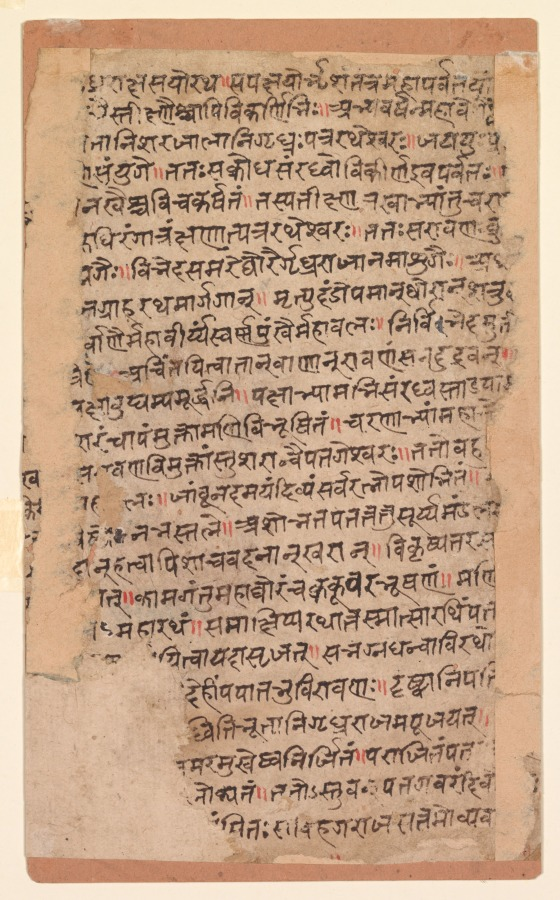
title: Battle of Ravana and Jatayu, from Chapters 50 and 51 of the Aranya Kanda (Book of the Forest) of Valmiki's Ramayana (Rama’s Journey); folio from the "Burnt" Ramayana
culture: Central India, Bundelkhand Region, Madhya Pradesh, Rajput Kingdom of Datia, Court of Raja Bir Singh Deo (reigned 1605–27)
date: c. 1605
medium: Gum tempera and ink on paper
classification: Painting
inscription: [[verso, text of Battle of Ravana and Jatayu: Sanskrit text in devanagari script]]: Now [an extraordinary fight ensued] there between the vulture [Jatayu] and the demon [Ravana], quite violent [as if] between two great, winged mountains. With sharp [arrows, broad-headed and made of iron] and spears too, [that immensely powerful demon] forcefully showered [the King of Vultures]. In the course of battle that vulture, Jatayu, Lord of Birds, [confronted] that mass of arrows [the weapons of Ravana], and then he, [that vulture], like a mountain shaken about [fell backward], and with his talons dragged him [Ravana] down, overcome by anger. And that immensely powerful Lord of Birds instantly made his [Ravana’s] limbs bloodied with his sharply taloned feet. Then, Ravana [in a rage] pierced the King of Vultures in battle with [three direct arrows], frightful and swift. And after, he took up his other dreaded arrows on reserve, [with their arrowheads straight]. Each one resembled Death’s staff, [crushing insolence in] enemies. That immensely powerful, mighty demon pierced the [the bird’s body] with [perfectly sharp], golden-feathered arrows . . . . Without even taking those arrows into account, that enraged bird launched himself at Ravana. [Flying upward and then rushing down], raising his wings overhead, he battered [Ravana] with those feathered limbs. [Then, that Lord of Birds, energy blazing, splintered] with his claws [Ravana’s] bow and arrows, adorned with gems and pearls. And that Lord of Birds [splintered] also those very arrows shot [by Ravana]. Then, that immensely powerful [Indra of Birds] [over and over again, pecked at Ravana’s divine crown] made of gold and glittering with every jewel, and [being full of rage, hurled] it through the sky. Like the sun’s halo, it glistened as it sank. [That bird] struck down the asses, with their golden chest armor and devilish [pishacha] faces, and yanking them about, [instantly deprived them of breath]. He [smashed] the fearsomely huge chariot, which flies upon a wish, ornamented from wheel to pole, [each part arrayed in gold] and jewels. Tearing the charioteer from the chariot, [that Lord of Birds], with talons [that seemed like elephant goads, quickly shred him], then tossed him away. Ravana, his bow broken, chariot done with, [his asses killed, his charioteer slain,] fell to the ground, holding Vaidehi [in the crook of his arm]. Seeing Ravana fallen to the ground, his chariot smashed, all the other creatures celebrated the King of Vultures, crying—“Well done, well done!” [And the gods and sages] were amazed when they saw [Ravana, the destroyer of pride among enemy armies,] who was never defeated [by the gods and demons] on the front lines, defeated now [by the best of birds]. Then the denizens of the heavens praised that best of birds—“O excellent one, you have accomplished a difficult task!” The venerable King of Birds, who was extolled, became resolute and once again endured battle.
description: The vulture Jatayu, Lord of the Birds, his beak agape, loses feathers and dark red blood in his desperate fight to save Sita from her kidnapper, the ten-headed Ravana. Since this painting was damaged by fire in India decades ago, Sita is barely visible now at the bottom right corner, in Ravana’s donkey-led chariot. Her expression is pensive, as she awaits her fate. In adherence to the Ramayana text written on the back of the painting, the donkeys were the first victims in the battle that will claim Jatayu’s life.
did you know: This page is from a series known as the “Burnt Ramayana,” since it was damaged by fire.